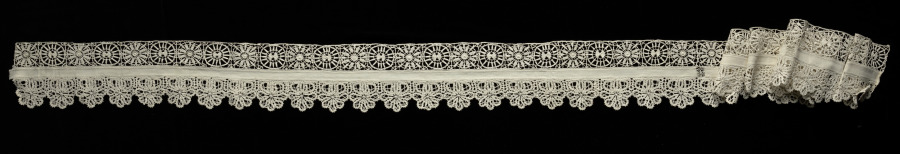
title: Lace Edging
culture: Italy, Genoa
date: 1600s–1700s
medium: Bobbin lace (tape lace)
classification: Lace